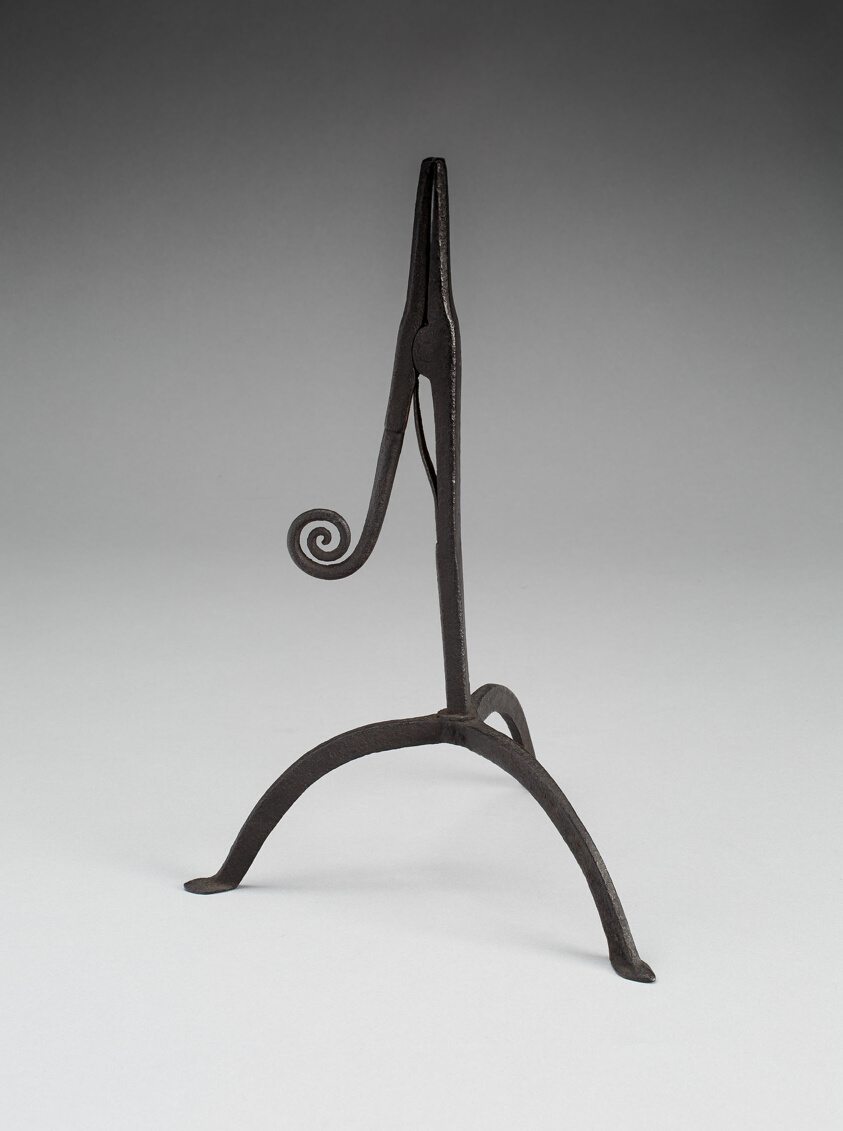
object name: Decorative Arts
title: Rushlight Holder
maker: Artist unknown (American, active 18th–19th century)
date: 1750–1850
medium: Iron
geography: United States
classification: metalwork; american decorative arts; american arts; decorative arts